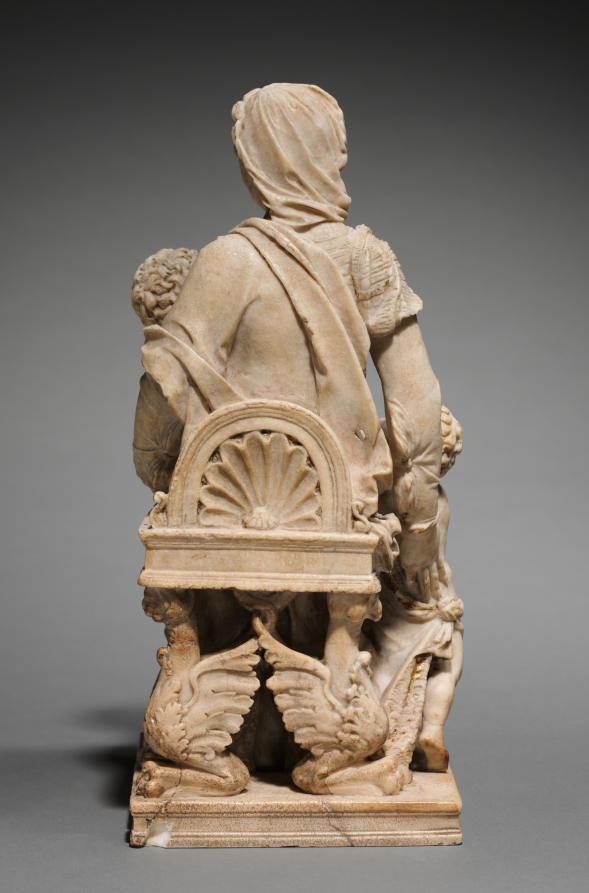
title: Charity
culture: Franco-Flemish, second half 16th century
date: c. 1550–1600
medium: alabaster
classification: Sculpture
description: When this alabaster group entered the museum's collection, it was thought to depict the Virgin Mary, Christ, and Saint John the Baptist. It has been identified, however, as a personification of Charity, the most elevated of the three Christian theological virtues. The two other theological virtues are Faith and Hope. Within Christian belief, Charity is also known as a supernatural virtue, where the object of human conduct is the ultimate unification with God through love. Alluding to its eminent position, Charity sits enthroned, with powerful hybrid beasts supporting her chair. The diminutive footstool propping up her left foot may refer to the necessity of humility in one's relationship to God. Also, a child raises a vessel filled with fruits to another suggesting that selflessness and love are attributes of charitable actions.